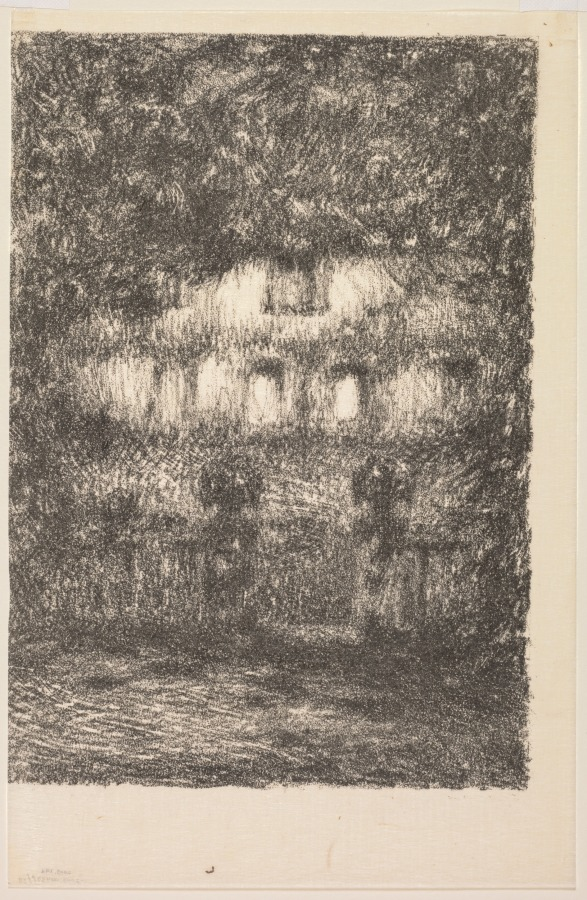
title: The House in Moonlight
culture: France, 20th century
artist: Henri Le Sidaner (French, 1862–1939)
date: 1909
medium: lithograph printed in black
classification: Print